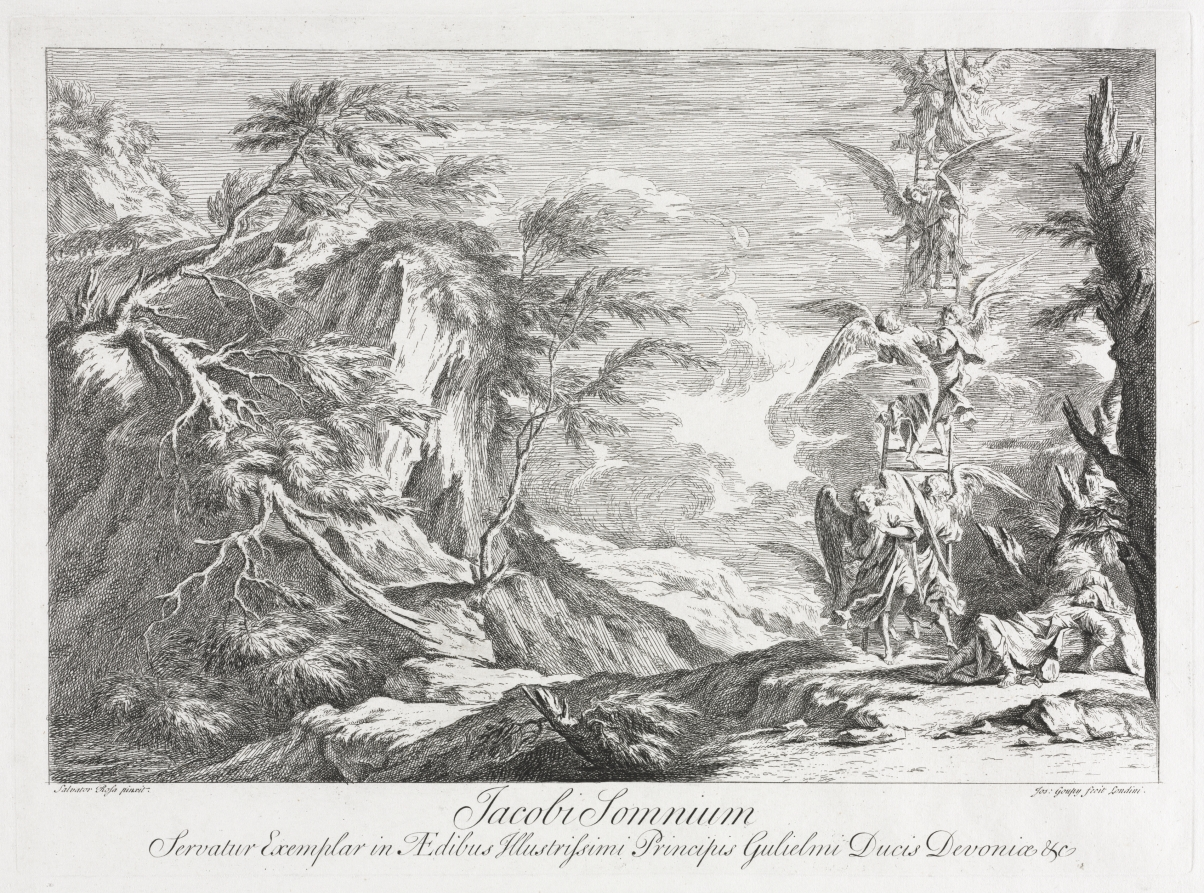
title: Jacob's Dream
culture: England, 18th century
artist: Joseph Goupy (British, 1686–before.1770)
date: c. 1720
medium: etching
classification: Print